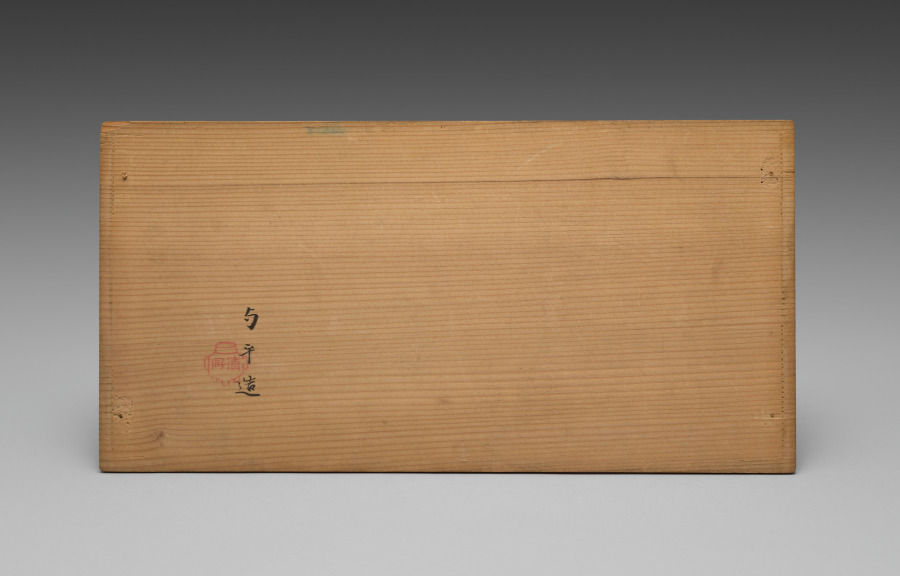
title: Dining Set with Plum Blossoms and Cracked-Ice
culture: Japan, Edo period (1615–1868) to Meiji period (1868–1912)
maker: Seifū Yohei II (Japanese, 1844–1878)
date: 1875–78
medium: Porcelain with molded designs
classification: Ceramic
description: Each item in this set has a delicate low-relief design of flowering plum branches over scattered, intersecting lines meant to resemble the cracked-ice surface of a frozen body of water and is signed on the base in gold pigment. While Yohei II produced many fine works in underglaze blue, like those produced by Kiyomizu Shichibei, he also made works in quite different styles later in his career, from the early 1870 s. In 1873, he was appointed purveyor to the Industrial Center of Kyoto Prefecture, a designation associated with Kyoto’s efforts to reach an international market through the port of Kobe; and from 1875 until his death, he was involved in national-level projects to present Japanese ceramics across the world. It was during this period that Yohei III was apprenticed to Yohei II, and it has been suggested that this set may in fact be an early example of Yohei III’s work, which he signed with his teacher’s name. Decorated with flowers resembling Japanese textile motifs, the set calls to mind the design of Yohei II’s pair of vases with plum blossoms in the Victoria and Albert Museum. Here, the elaborate trees created for a formal public exhibition setting have been translated into the approachable blossoms of the genteel domestic environment. While the designs are consistent across the pieces, each raised flower petal and pistil and each incised line in the ice was done by hand, so the cups, bowls, and dishes are similar yet unique. The bottoms of two boxes once identified the set’s owner, but the information has been deliberately obscured with black ink. However, inscriptions still visible appear to indicate two occasions, once at the end of July 1886 , and once again in June 1916 , when parts of the set were requested from Hokura in Niigata Prefecture. The location corresponds to a neighborhood in the present-day city of Jōetsu. The surname Tsuji 辻 also appears on a paper tag affixed to one of the box cloths. Future research may possibly reveal more about their provenance. A vase by Yohei III in a private collection combines the formal grandeur of the Yohei II vases in the Victoria and Albert Museum with the gentler design of this dining set, placing flowering plum trees against soft, scalloped-edge clouds resembling those in golden screens.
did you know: The dining wares have a creamy white coloration that the four boxes containing them identify as Korean in style.